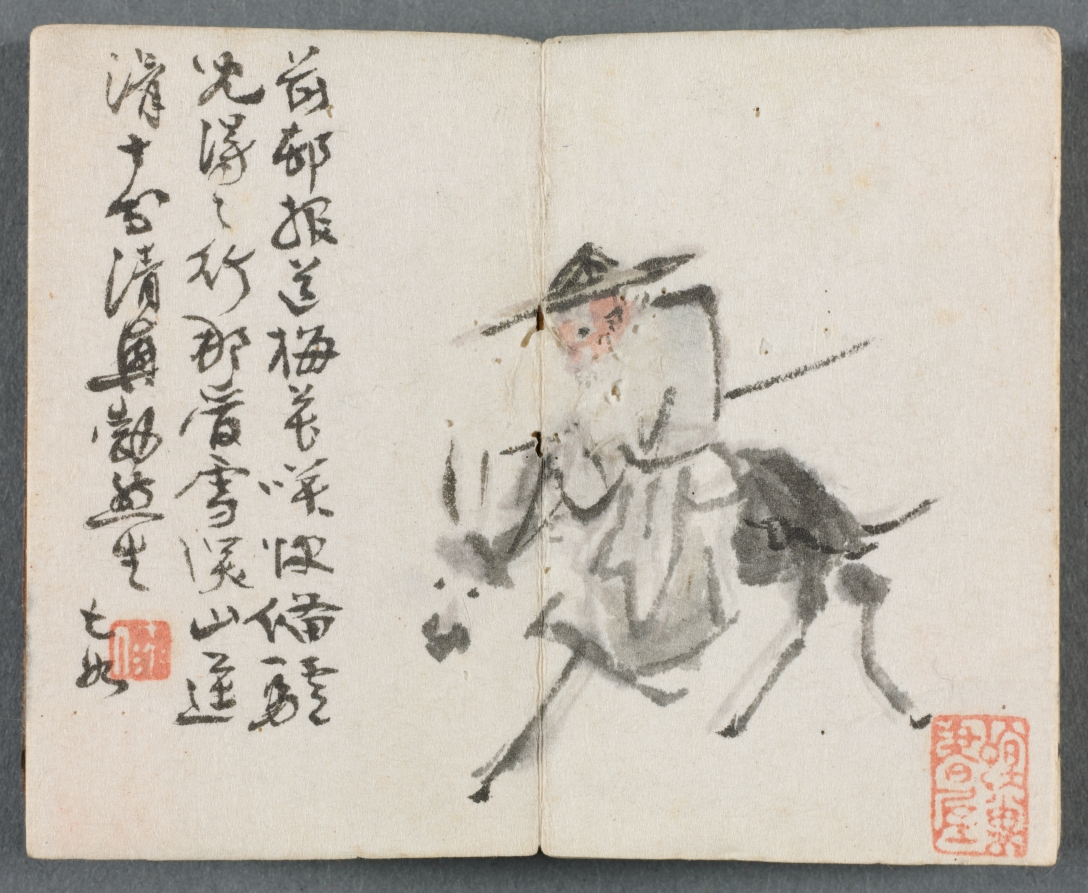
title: Miniature Album with Figures and Landscape (Old Man on Donkey)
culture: China, Qing dynasty (1644–1911), Qianlong reign (1736–95)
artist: Zeng Yandong (Chinese, c. 1751–1827)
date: 1822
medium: album leaf, ink and color on paper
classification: Painting